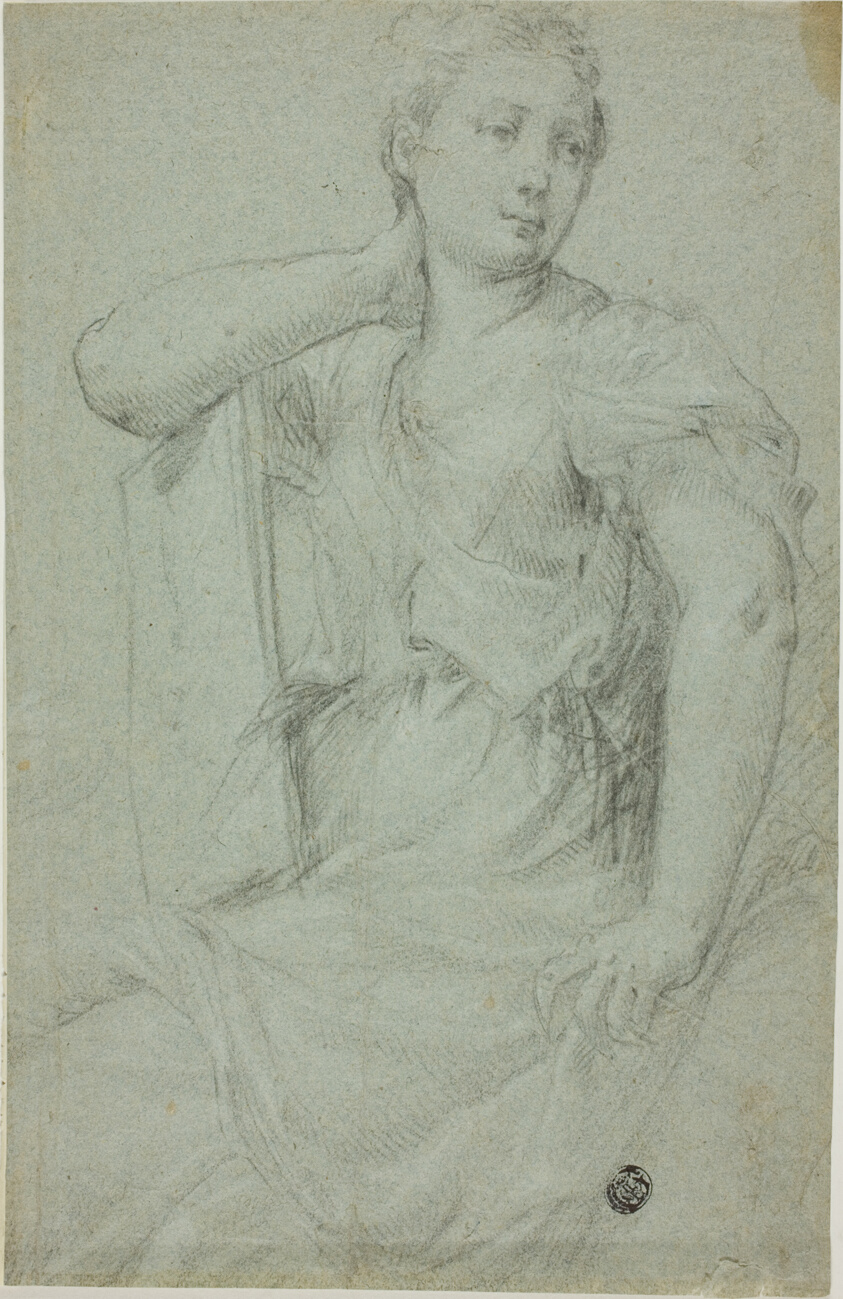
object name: Drawing and Watercolor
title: Seated Woman with Folio Resting on Her Lap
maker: Style of Mario Balassi (Italian, 1604-1667)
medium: Black chalk, heightened with white chalk, on blue laid paper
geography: Italy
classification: graphite; drawings (visual works); prints and drawing